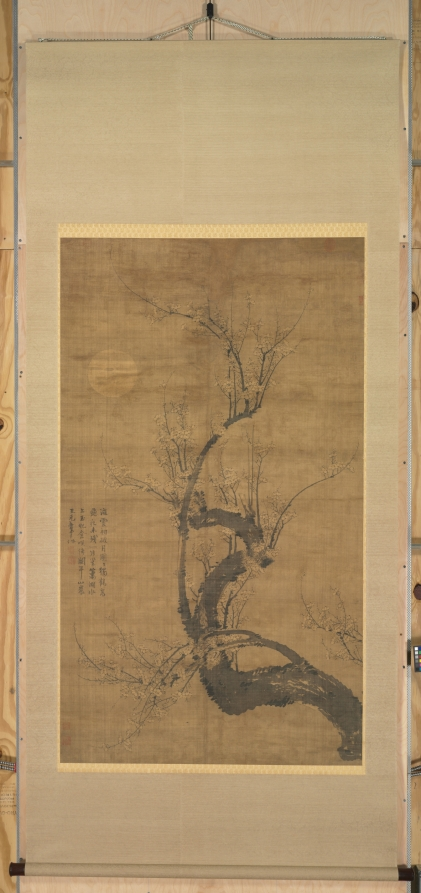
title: A Prunus in the Moonlight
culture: China, Yuan dynasty (1271-1368)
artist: Wang Mian (Chinese, 1287–1359)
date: 1300s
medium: Hanging scroll; ink on silk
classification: Painting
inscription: 8 additional seals: 6 of the Qianlong 乾隆 emperor (r. 1736-95); 2 of Dong Gao 董誥 (1740-1818).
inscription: 海雲初破月團團，獨鶴高飛夜未殘。/ 一片笙簫湖水上，玉妃含笑倚闌干。 王元章作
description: The plum flourishes in the mild climate of the south, and it was not before the Six Dynasties period (220– 589 CE) that the motif began to be appreciated by southern artists, many of whom had emigrated from the north. Wang Mian from Zhejiang province had failed the civil and military service examinations and later rejected appointments under the Mongol government. Instead, he chose to return home, making a living by selling plum paintings. Few of Wang’s works have survived, but they demonstrate that by his time the ink-plum (momei) genre was fully developed.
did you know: The painting portrays the plum in the nighttime, as indicated by the tint of the background and the presence of the moon.